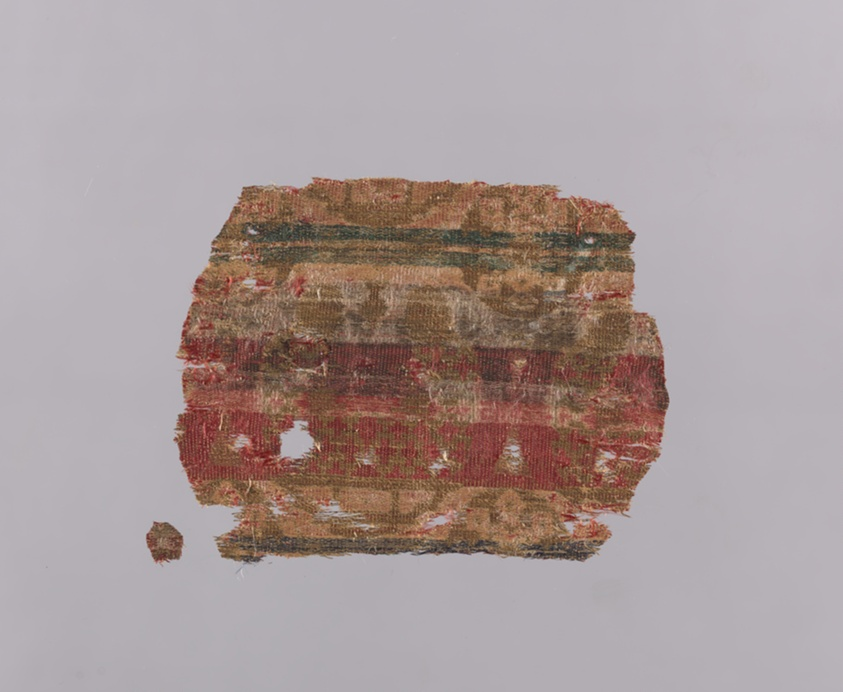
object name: Textile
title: Fragment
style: hispano-moresque, medieval, european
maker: Spain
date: 13th/14th century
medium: Silk and gilt animal substrate wrapped silk, weft-faced three and four color complementary weft plain weave with inner warps and areas of detached plain weave of inner warps and complementary ground wefts (red)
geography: Spain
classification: textile; weaving